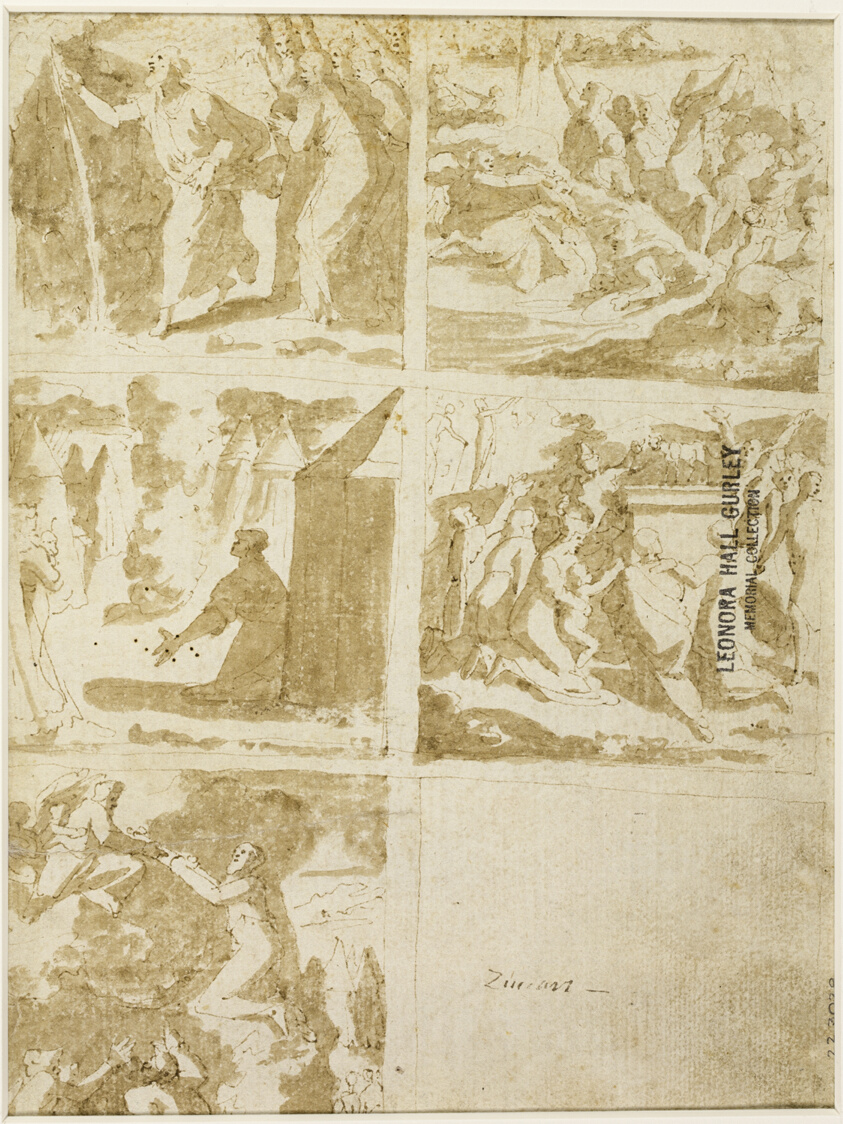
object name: Drawing and Watercolor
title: Saints Peter and Paul Disputing with Simon Magus before Nero (recto); Five Scenes from the Story of Moses (verso)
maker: Andrea Boscoli (Italian, c. 1560-1608)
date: c. 1580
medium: Pen and brown ink with brush and brown wash, over traces of black chalk (recto), and pen and brown ink with brush and brown wash (verso), on ivory laid paper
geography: Italy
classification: pen and ink drawings; drawings (visual works); prints and drawing